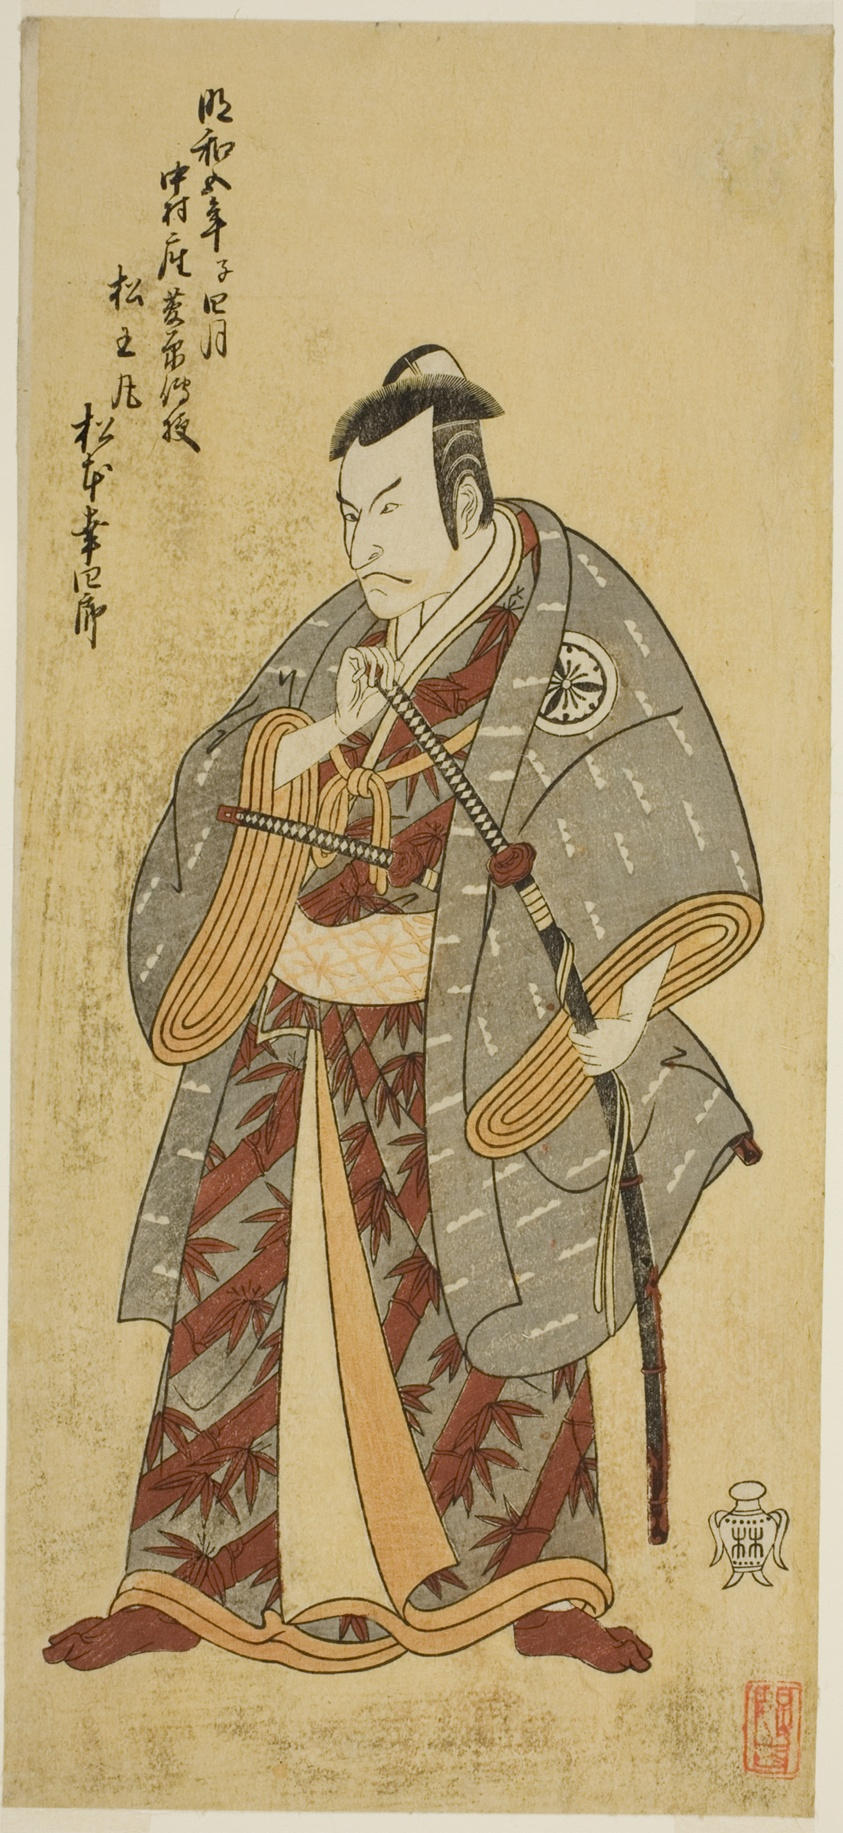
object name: Print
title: The Actor Matsumoto Koshiro III as Matsuo-maru in the Play Ayatsuri Kabuki Ogi, Performed at the Nakamura Theater in the Seventh Month, 1768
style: Japanese (culture or style)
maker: Attributed to Katsukawa Shunsho 勝川 春章; Japanese, 1726-1792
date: c. 1768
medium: Color woodblock print; hosoban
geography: Japan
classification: woodblock print; print; asian art